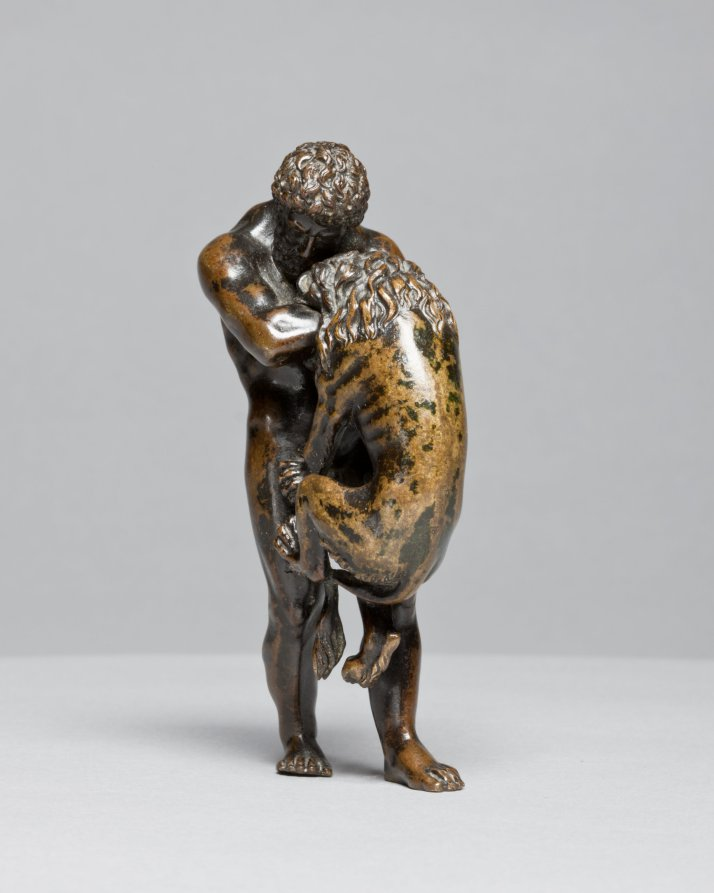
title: Hercules and the Nemean Lion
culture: Italy or France, 16th century or later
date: 1500s or later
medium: bronze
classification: Sculpture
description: The original owner of this work would have understood that this scene referred to the entire story of Hercules, the demi-god who had to accomplish twelve labors. The lion is named after the city of Nemea, near Corinth, a monstrous beast sent by the goddess Hera to wreak havoc on the area. After killing the lion, Hercules wore his pelt, commonly seen in other representations of the hero.